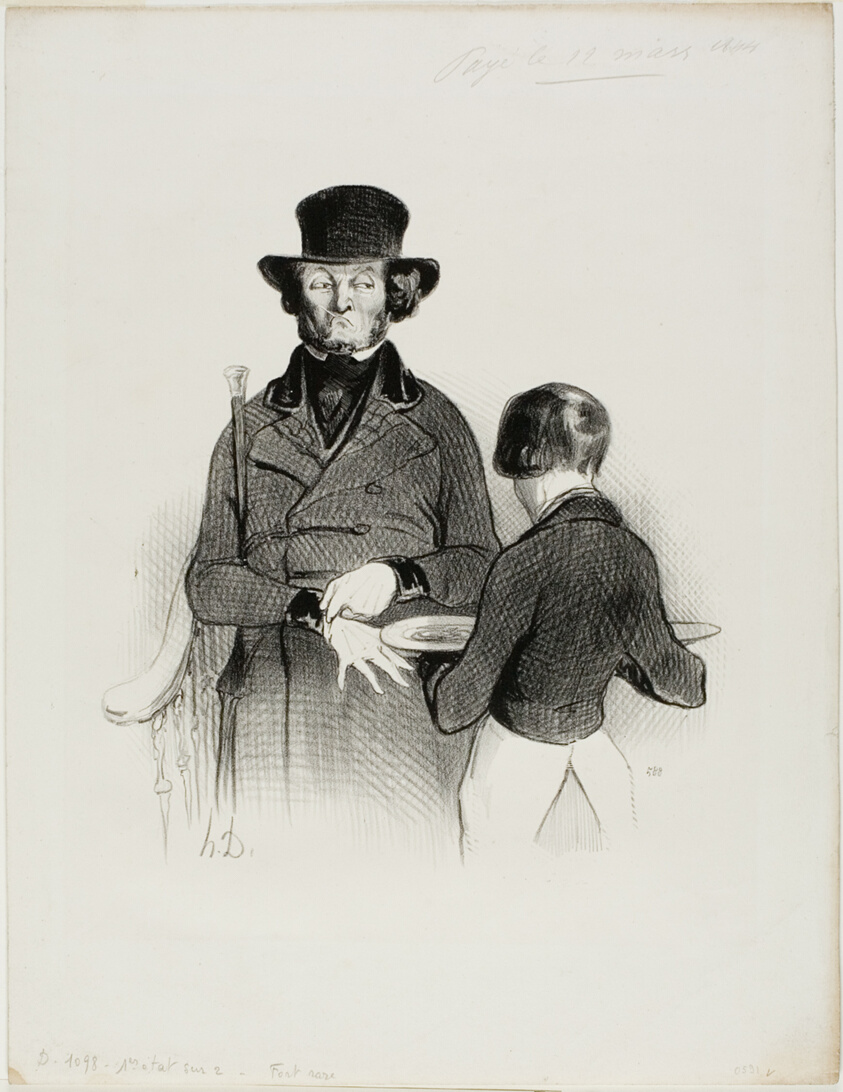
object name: Print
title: A Dinner at Véry's. “So what! I am having dinner by myself today... alright! But my wife gave me one Louis d'or and I still have... 60 centimes left,” plate 11 from Les Beaux Jours De La Vie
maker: Honoré Victorin Daumier; French, 1808-1879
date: 1844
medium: Lithograph in black on white wove paper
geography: France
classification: lithograph; print; prints and drawing